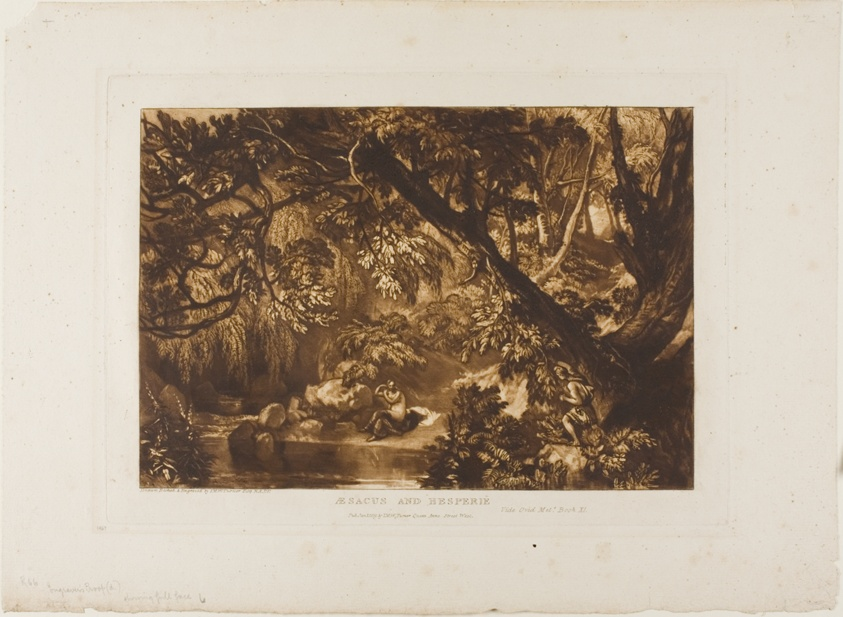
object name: Print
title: Aesacus and Hesperie, plate 66 from Liber Studiorum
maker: Joseph Mallord William Turner (English, 1775-1851)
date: published January 1, 1819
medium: Etching and engraving in brown on ivory paper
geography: England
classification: mezzotint; print; prints and drawing